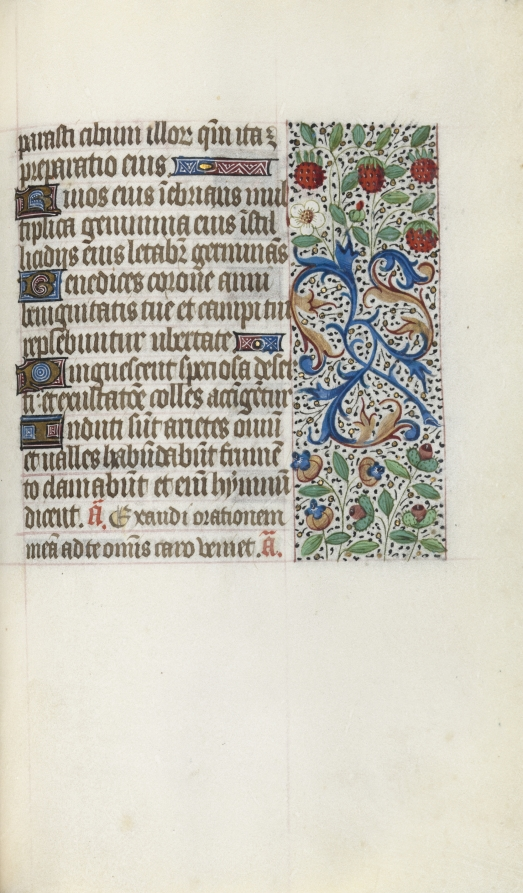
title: Book of Hours (Use of Rouen): fol. 137r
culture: France, Rouen, 15th century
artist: Master of the Geneva Latini (French, active Rouen, 1460–80)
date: c. 1470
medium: ink, tempera, and gold on vellum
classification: Bound Volume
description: In the late 1400s and early 1500s Rouen was an established and important center of book production. The city’s cathedral had a wealthy chapter that spent large sums of money to commission books and to maintain its extensive library. The stationers and booksellers would have likely been concentrated in or near the cathedral precinct. This artist, named after a manuscript now in Geneva, was Rouen’s principal illuminator during the second half of the 1400s.